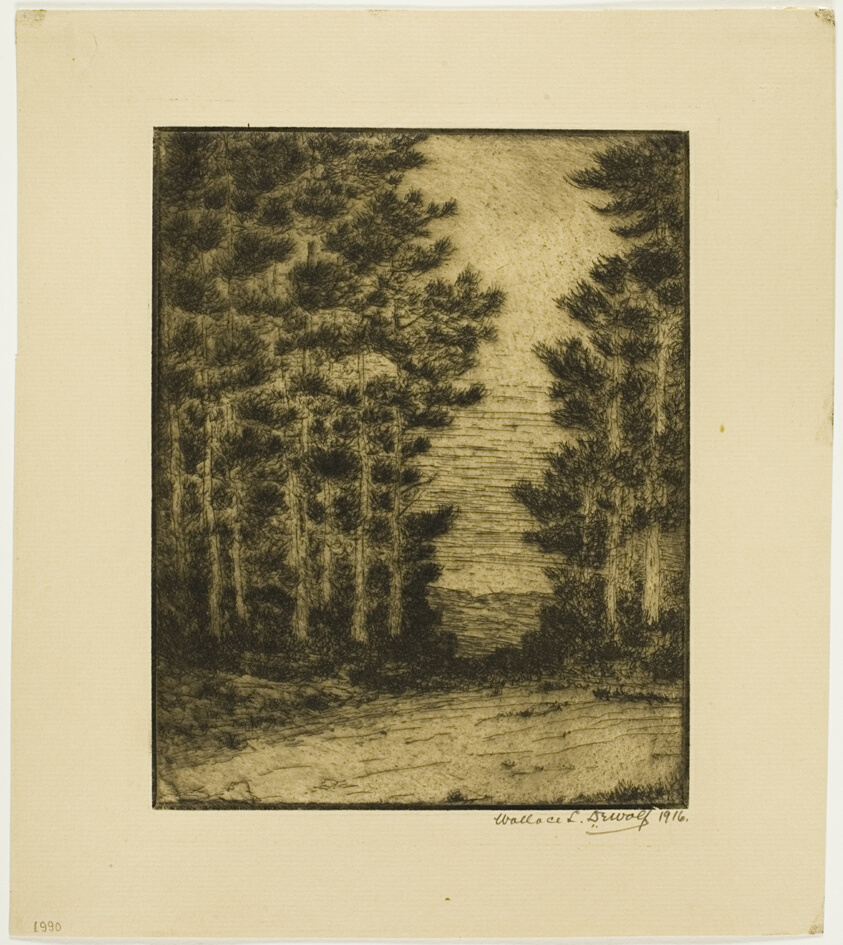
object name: Print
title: Landscape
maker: Wallace L. DeWolf (American, 1854-1930)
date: 1916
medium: Etching on tan laid paper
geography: United States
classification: etching; print; prints and drawing